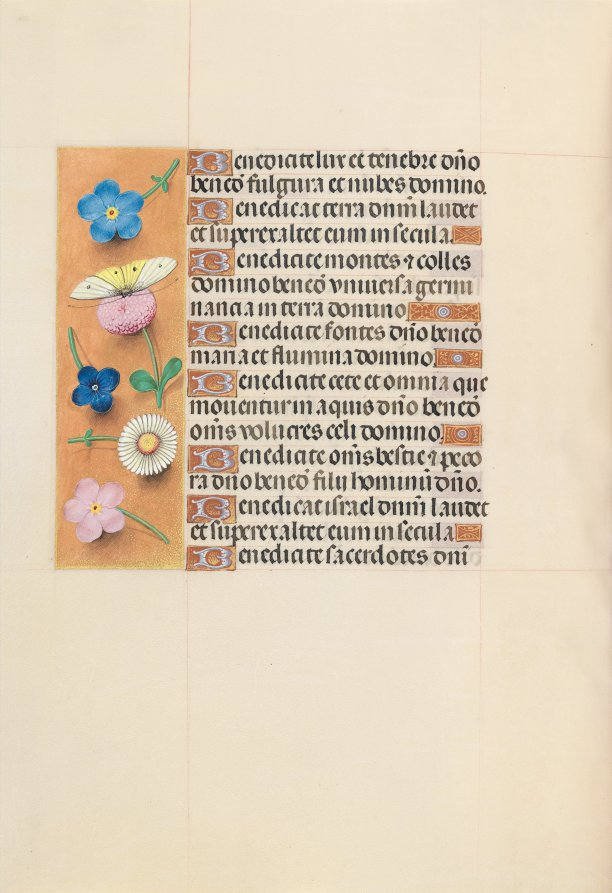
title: Hours of Queen Isabella the Catholic, Queen of Spain: Fol. 119v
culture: Flanders, Ghent and Bruges, late 15th century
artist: Master of the First Prayerbook of Maximillian (Flemish, c. 1444–1519)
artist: and Associates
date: c. 1500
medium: ink, tempera, and gold on vellum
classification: Bound Volume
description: This manuscript was illuminated by a circle of at least five highly organized manuscript painters active in the Flemish cities of Ghent and Bruges. The principal illuminator was Alexander Bening, who painted the majority of the book's miniatures. Manuscripts produced by this circle of artists are renowned for the decoration of their borders, which typically feature a rich variety of realistically-painted flowers, birds, and butterflies. This prayer book, called a book of hours, was intended not for a cleric, but for the private devotions of a lay person-in this case, Isabella the Catholic, Queen of Spain (1451-1504). Isabella's coat of arms embellishes the book's frontispiece. It is unlikely that the book was commissioned by the Queen herself; rather, she probably received it as a diplomatic gift from someone courting her patronage, perhaps Cardinal Francisco Jimenez de Cisneros. A Franciscan friar, Jimenez was dependent upon Isabella for his advancement, first to the post of Queen's confessor in 1492, and then to Archbishop of Toledo in 1495.